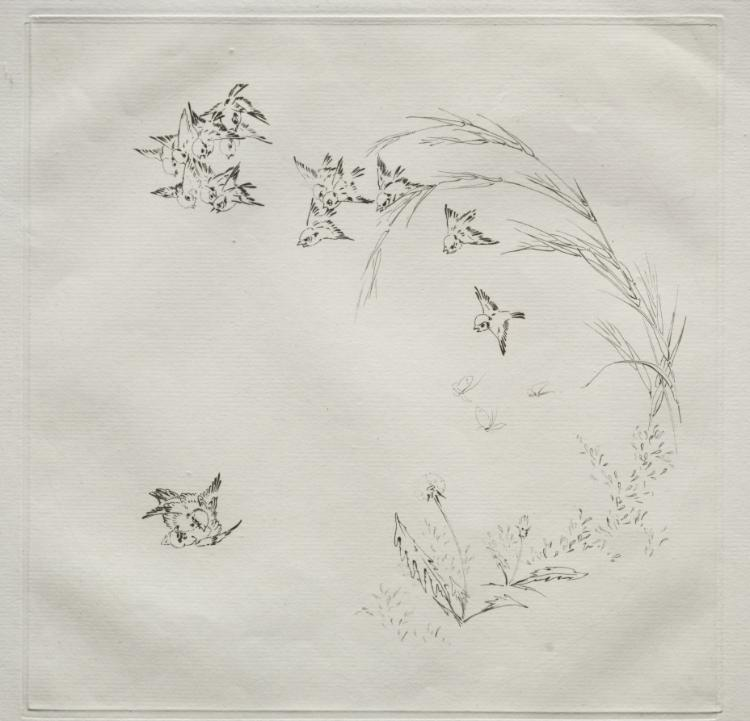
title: Parisian Service (Haviland service): The Fight (no. 2)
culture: France, 19th century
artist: Félix Bracquemond (French, 1833–1914)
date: 1875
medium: etching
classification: Print